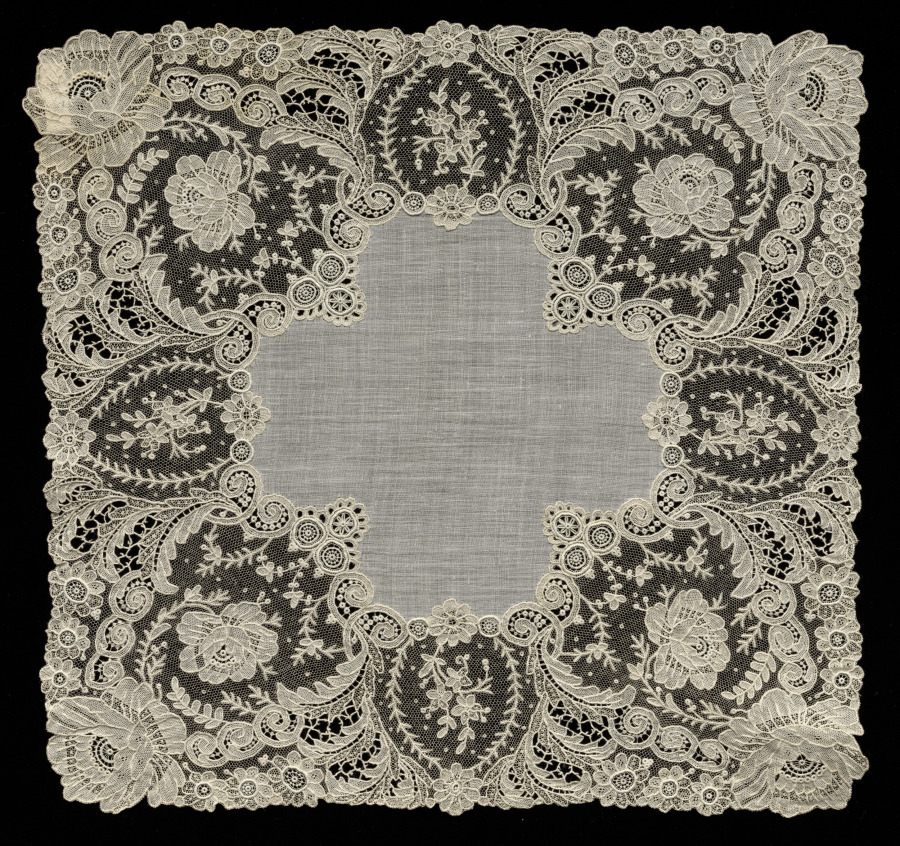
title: Lace Handkerchief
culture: Flanders, 1800s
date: 1800s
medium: Plain weave linen center; needle lace (Point de Gaze) border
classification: Lace